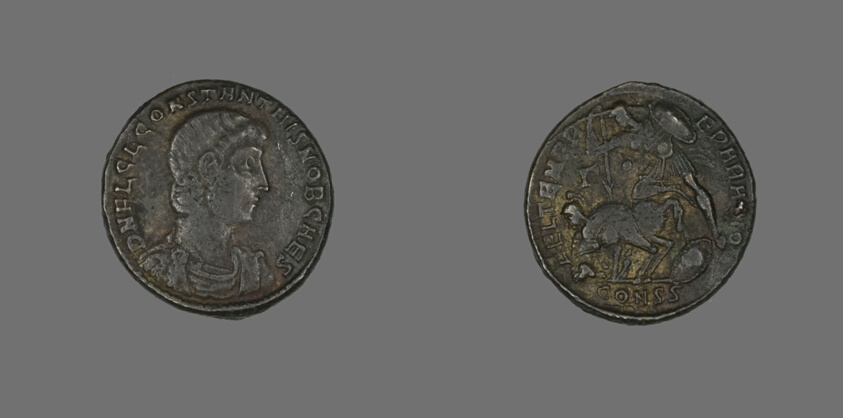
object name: Coin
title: Coin Portraying Emperor Constantine II or Emperor Constantius Gallus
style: constantinian, late antique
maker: Roman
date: 317/337 or (Constantine II) 351/354 (Constanius Gallus)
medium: Bronze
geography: Roman Empire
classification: coin; ancient art